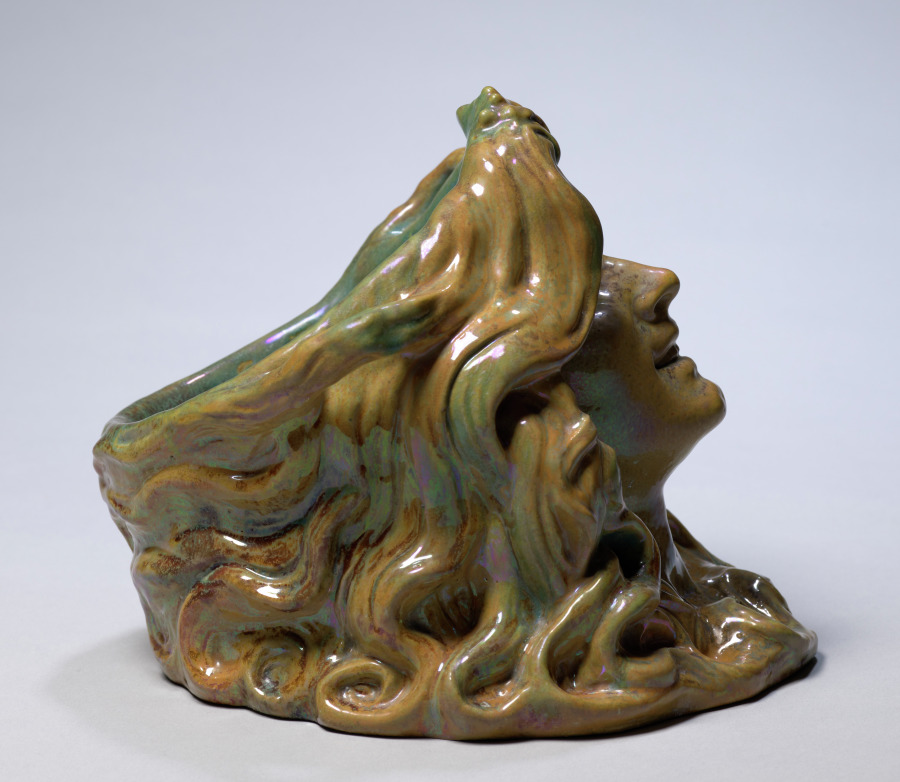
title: Vase in the Form of a Woman's Head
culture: France, late 19th Century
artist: Emile Muller (French, 1889)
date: c. 1895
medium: stoneware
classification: Ceramic